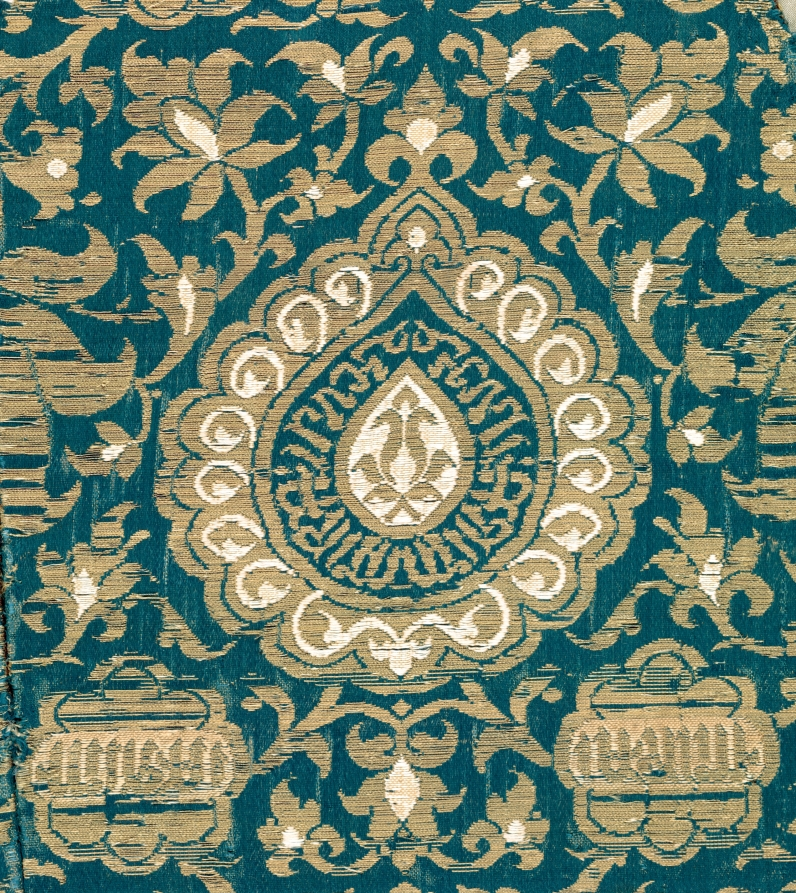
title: Mantle for a Statue of the Virgin with Lotus Blossoms and Medallions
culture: Egypt and Spain; Egypt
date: c. 1430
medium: Silk and gilt-metal thread: lampas weave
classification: Textile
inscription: Glory to our master, the sultan, the king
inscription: The sultan, the king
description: This costly royal silk with extensive gold thread was woven in Egypt and gifted or exported to Spain, where it was pieced into this mantle for a statue of the Virgin, probably to be worn during festivals and processions. The sturdy silk brocade foundation cloth was also woven with a lighter weight silk damask with a repeating mirror image. Therefore, the Arabic inscription in the medallions reads both forward and backward: Glory to our master, the sultan, the king. The inscribed lobed roundels say The sultan, the king.